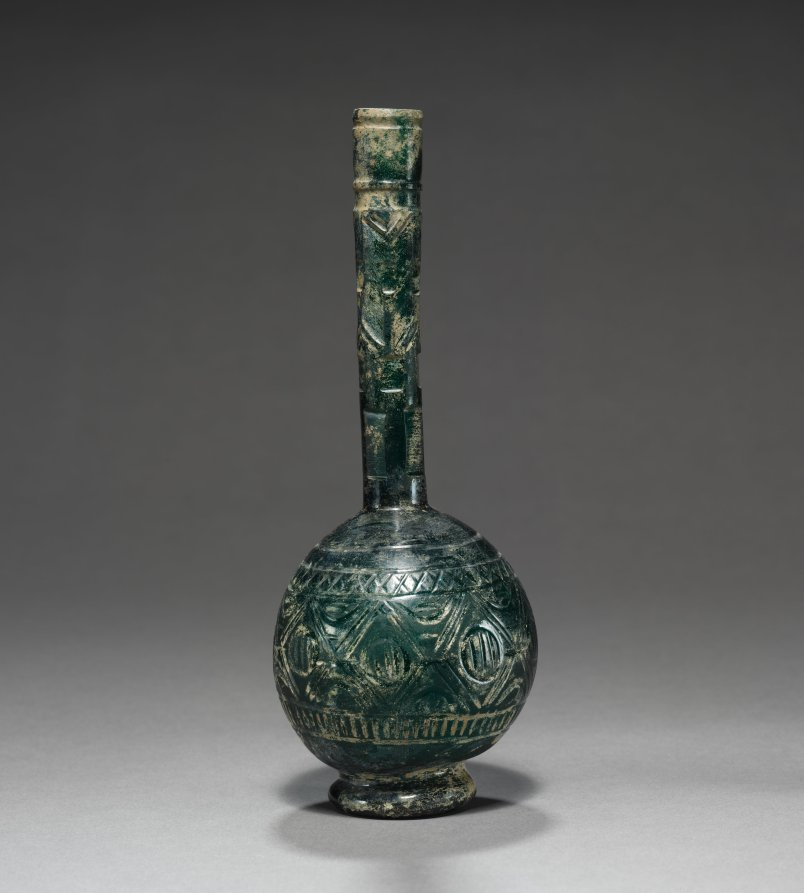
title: Bottle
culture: Iran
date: 800s–900s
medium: glass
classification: Glass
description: This dark blue-green glass bottle has a wide decorative band with a geometric pattern carved on its body and neck.